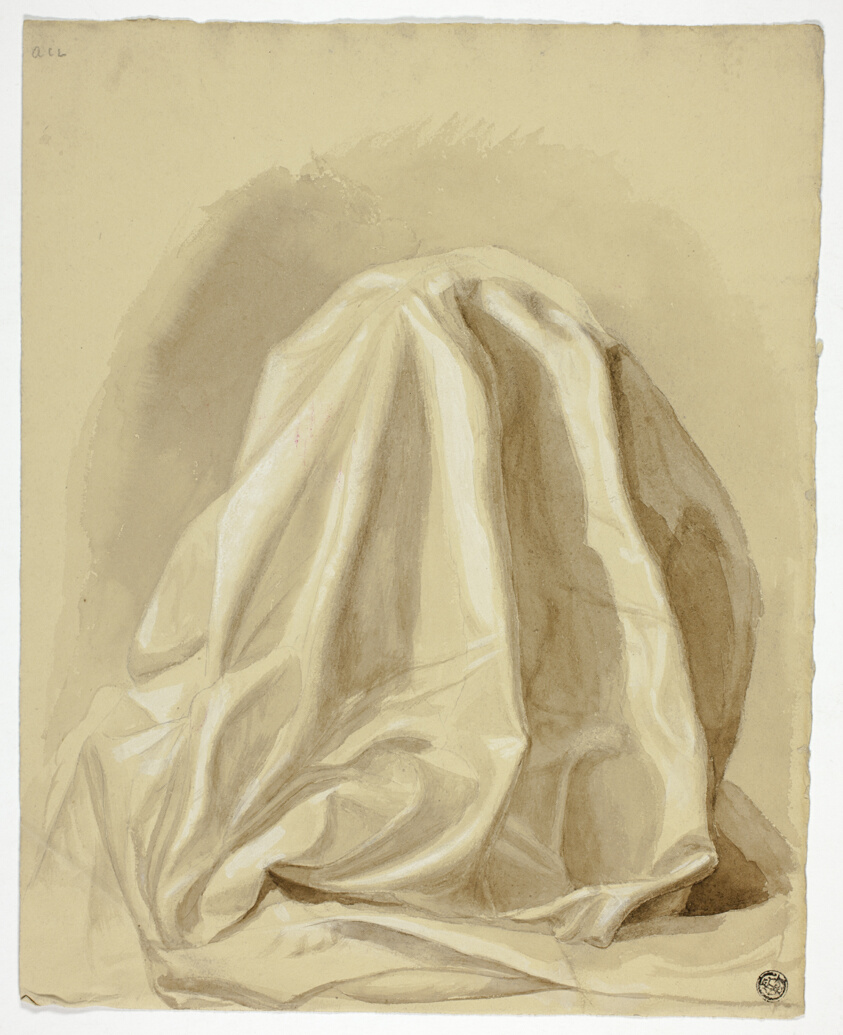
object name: Drawing and Watercolor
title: Draperies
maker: Andrea Carlo Lucchesi (English, 1860-1924)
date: c. 1877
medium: Brush and brown wash, with graphite, heightened with white gouache, on cream wove paper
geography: England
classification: ink or chalk wash; drawings (visual works); prints and drawing